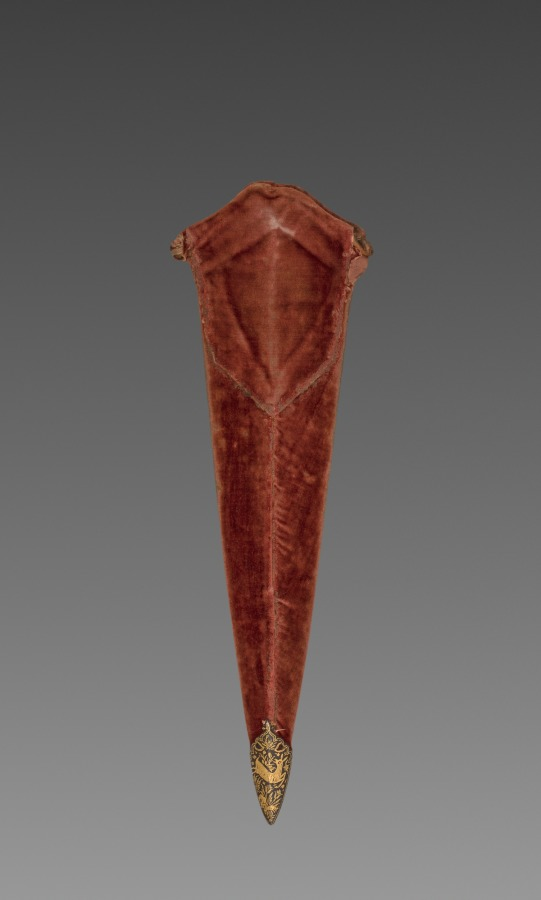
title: Katar (Stabbing Dagger): Sheath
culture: India, Mughal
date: 1700s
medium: wooden sheath with velvet cover, brass boss, iron tip with gold inlay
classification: Arms and Armor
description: Stabbing daggers called katar were distinctive to India and often worn by soldiers and courtiers, tucked into their belts. Covering the entire handle are tiny scenes of lions and cheetahs hunting deer and buffalo in rocky wooded settings.